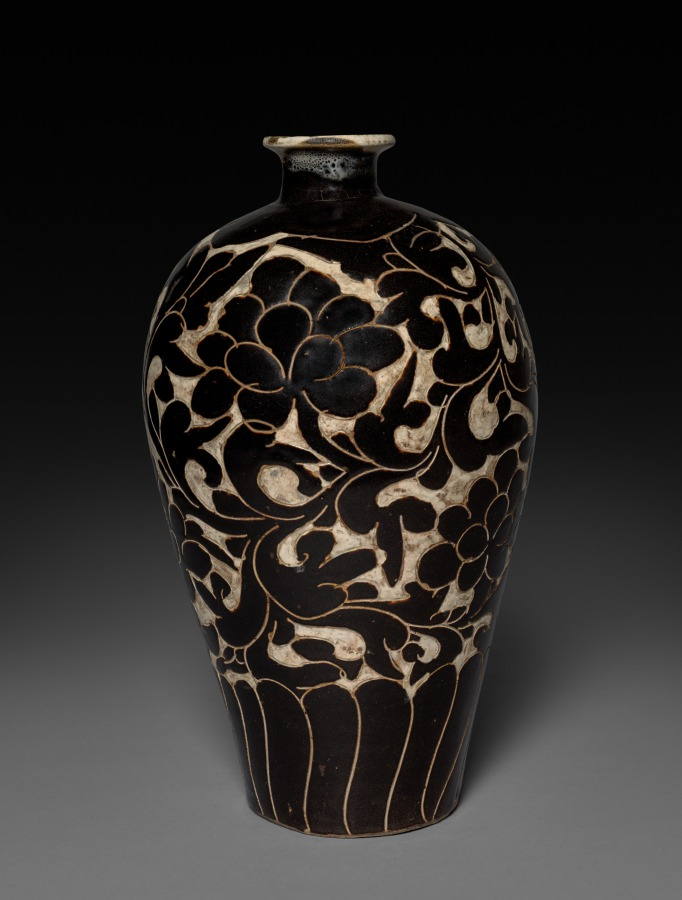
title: Vase with Peony Decoration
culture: China, Northern Song dynasty (960-1127)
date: 1000s-1100s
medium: Gray stoneware with underglaze slip decoration, Cizhou ware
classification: Ceramic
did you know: The thick foot rim is unglazed, while the shallow recessed flat base is covered with white slip and chance accumulations of underglaze pigment.